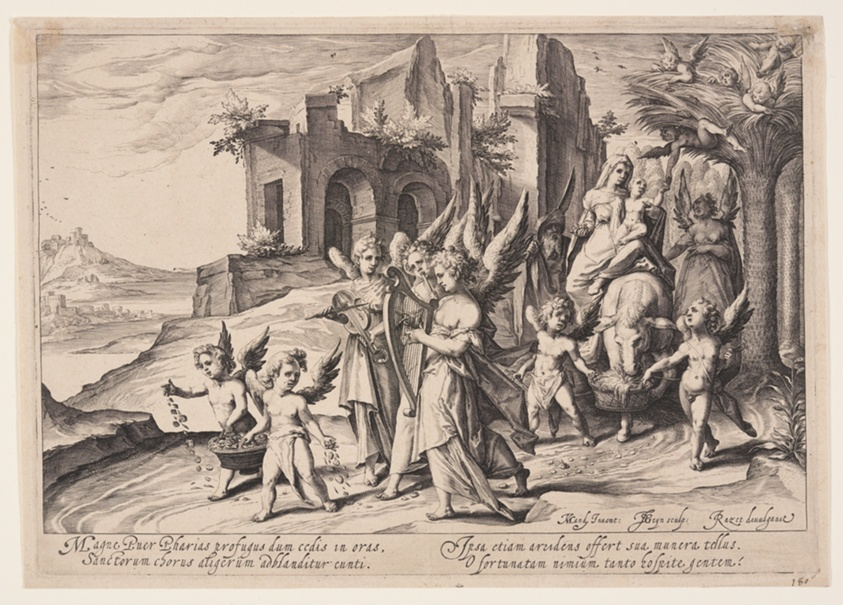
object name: Print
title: Return from the Flight into Egypt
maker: Jacques de Gheyn II (Dutch, 1565–1629)'; after Karel van Mander (Dutch, 1548–1606)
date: c. 1592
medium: Engraving on laid paper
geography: Netherlands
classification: engraving; paper; print; prints and drawing